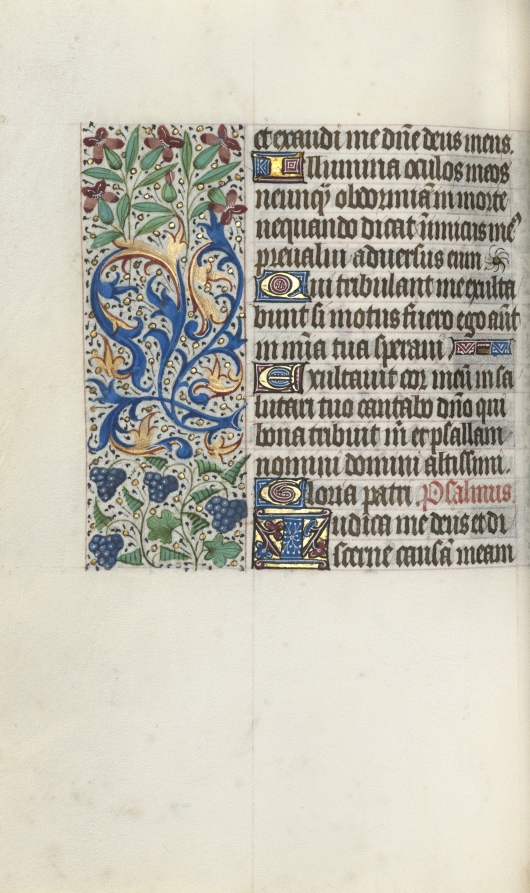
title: Book of Hours (Use of Rouen): fol. 75v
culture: France, Rouen, 15th century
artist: Master of the Geneva Latini (French, active Rouen, 1460–80)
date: c. 1470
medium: ink, tempera, and gold on vellum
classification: Bound Volume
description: In the late 1400s and early 1500s Rouen was an established and important center of book production. The city’s cathedral had a wealthy chapter that spent large sums of money to commission books and to maintain its extensive library. The stationers and booksellers would have likely been concentrated in or near the cathedral precinct. This artist, named after a manuscript now in Geneva, was Rouen’s principal illuminator during the second half of the 1400s.